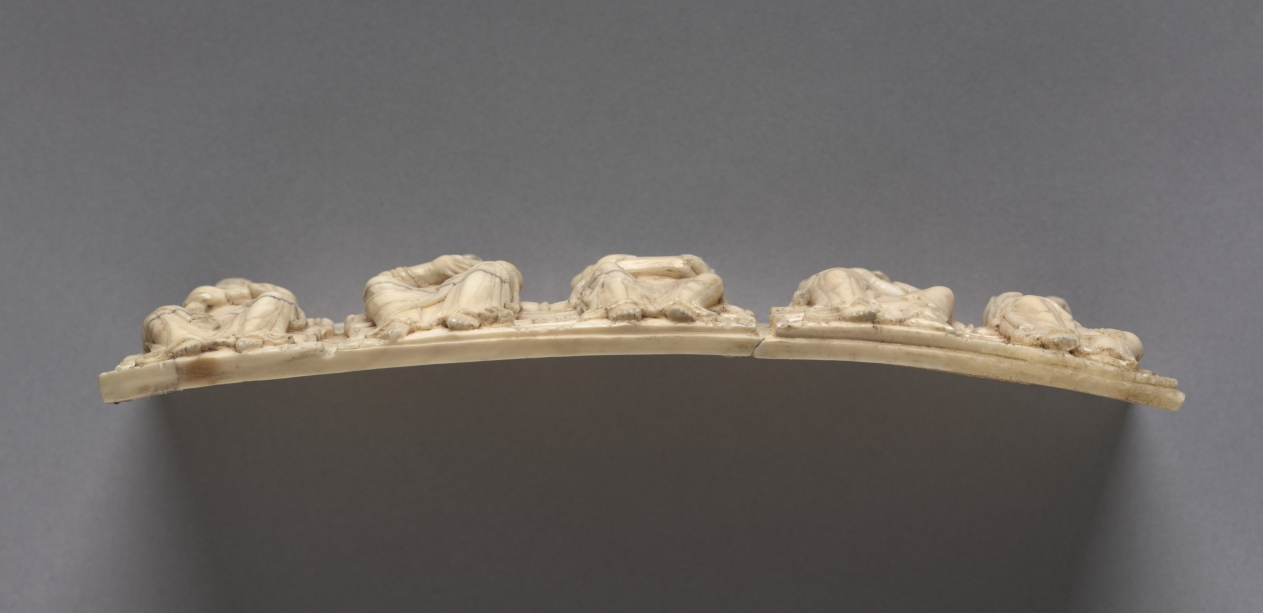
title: Plaque from a Portable Altar Showing Christ and the Apostles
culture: Germany, Lower Rhine Valley, Romanesque period, 11th century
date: 1050–1100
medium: walrus ivory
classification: Ivory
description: This intricately carved ivory panel once decorated the side of a portable altar. One of three plaques, it depicts Christ's apostles and was one of the first major acquisitions of William M. Milliken, the museum's first curator of decorative arts and later director (1930–1958). As Milliken later recalled, the pieces "were immensely intriguing, monumental in scale, even if tiny in size, the Christ in the mandorla could have been enlarged and would have graced the tympanum of a great cathedral."